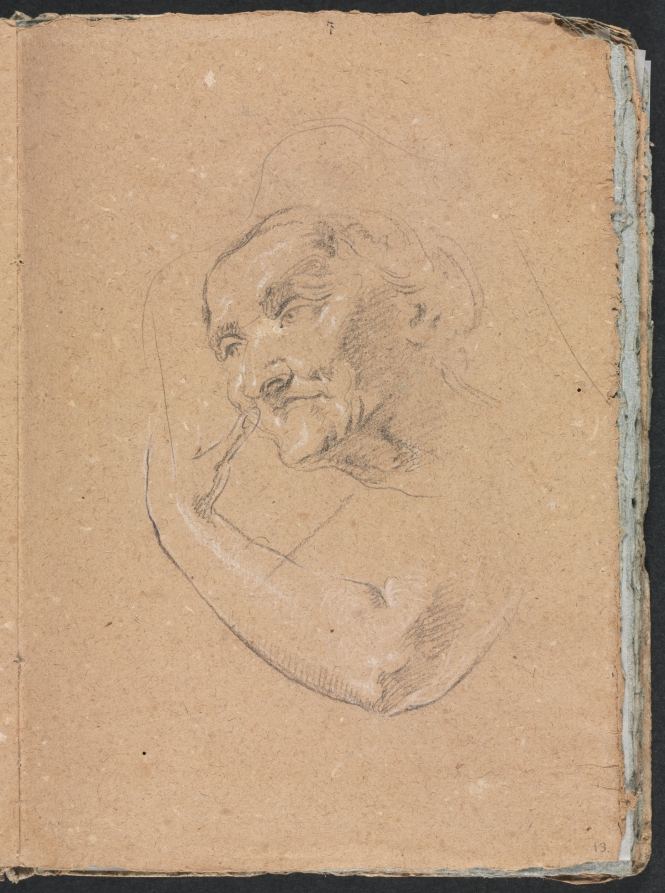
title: Verona Sketchbook: Head of a woman with left arm (page 13)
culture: Italy, 18th century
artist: Francesco Lorenzi (Italian, 1723–1787)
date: 1760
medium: black chalk with white heightening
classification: Bound Volume